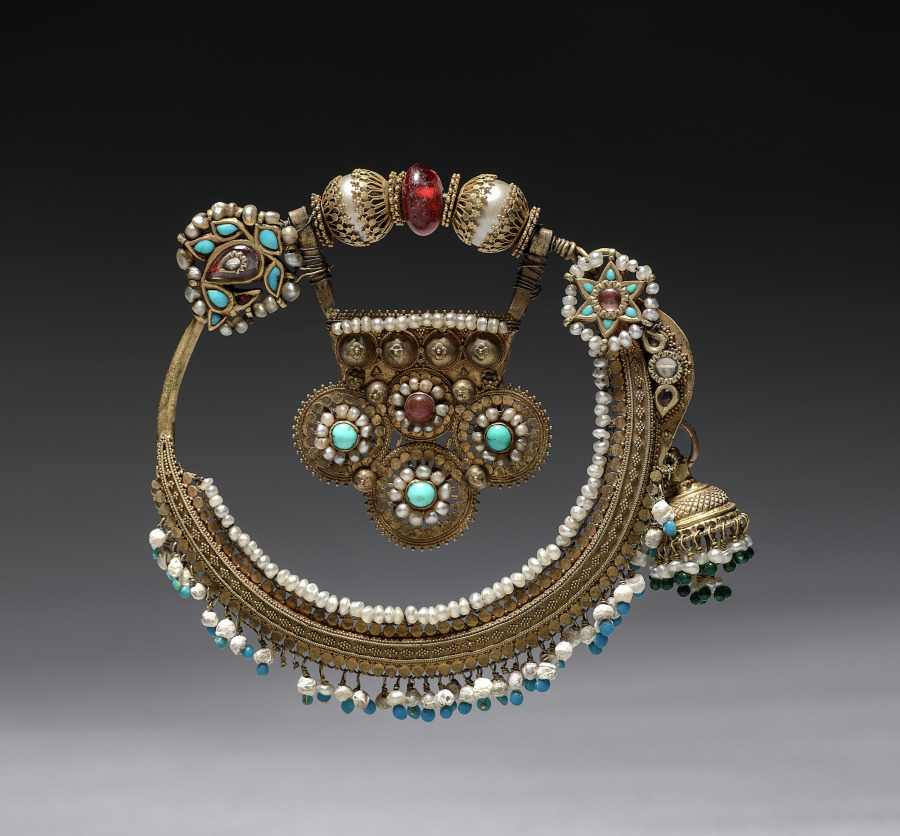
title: Nose Ring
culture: India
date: 1800s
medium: silver gilt with stones and beads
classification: Jewelry